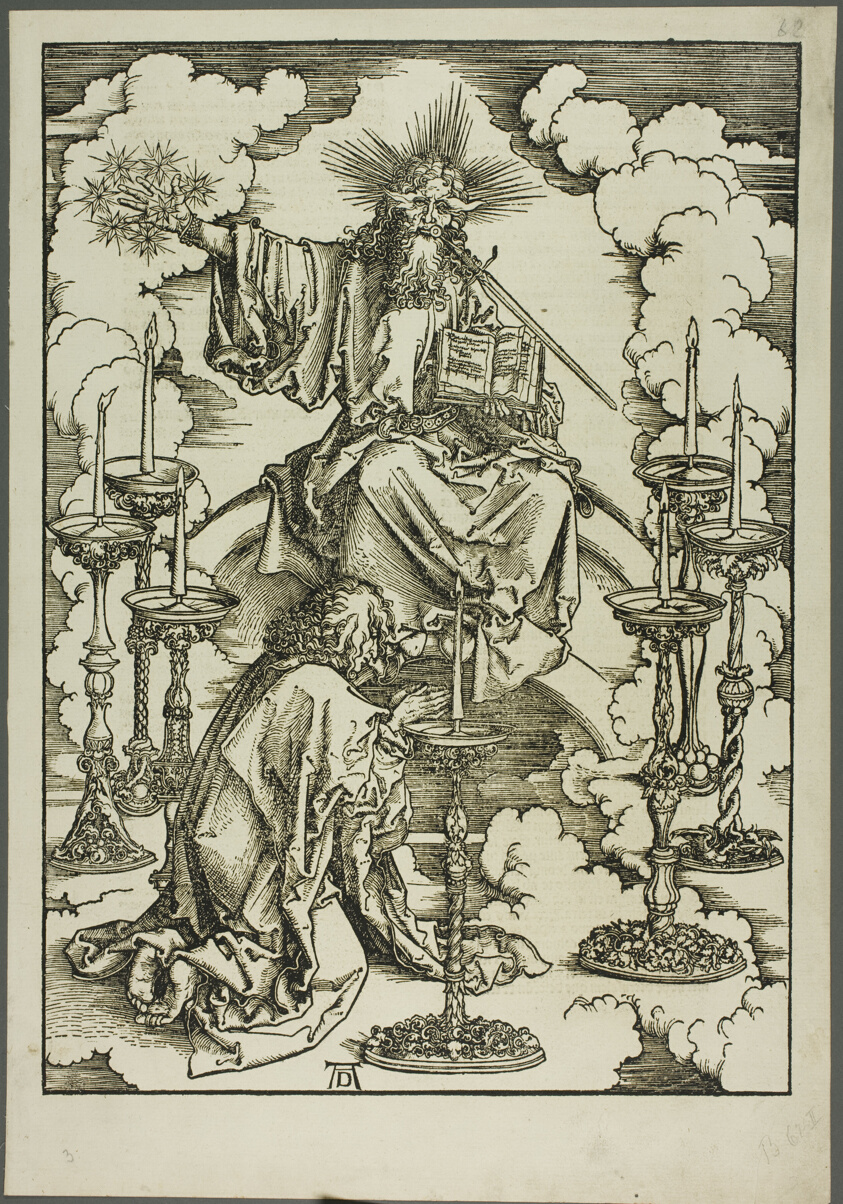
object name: Print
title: The Vision of the Seven Candlesticks, from The Apocalypse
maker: Albrecht Dürer (German, 1471-1528)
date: c. 1496–98, published 1511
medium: Woodcut in black on tan laid paper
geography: Germany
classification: woodcut; print; prints and drawing; paper